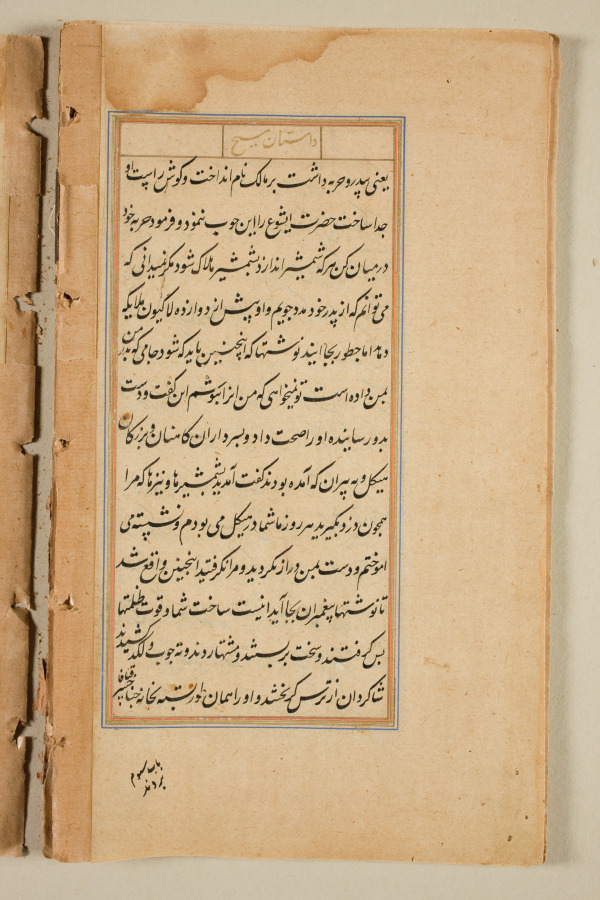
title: Text page from a Mirror of Holiness (Mir’at al-quds) of Father Jerome Xavier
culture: Mughal India, Allahabad, made for Prince Salim (1569–1627)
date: 1602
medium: Ink and gold on paper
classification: Manuscript